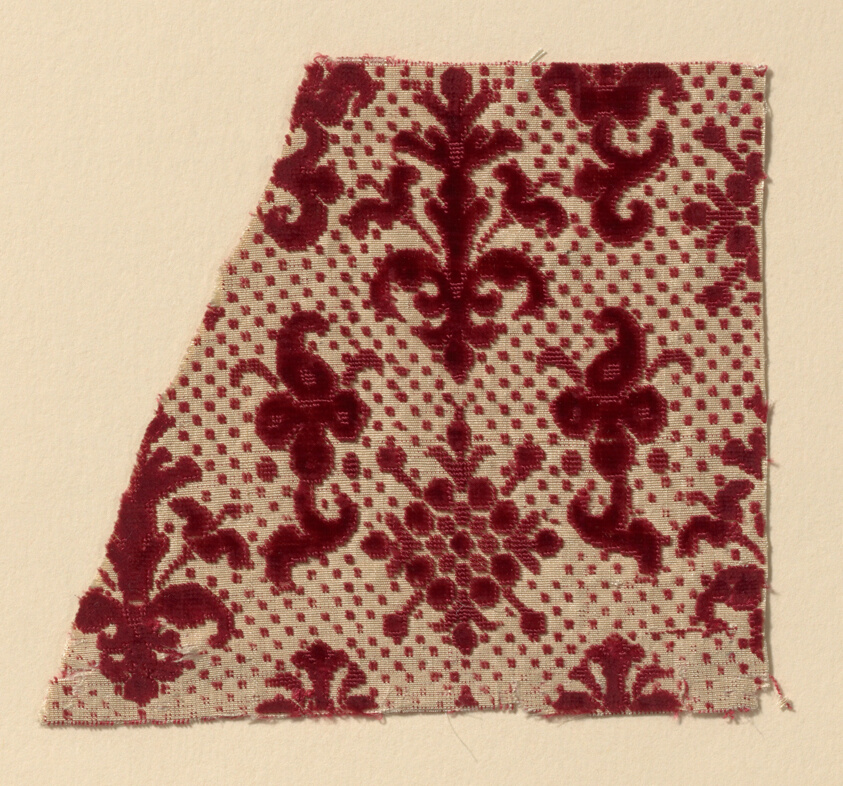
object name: Textile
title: Fragment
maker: Italy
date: c. 1700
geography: Italy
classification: textile; weaving - velvet